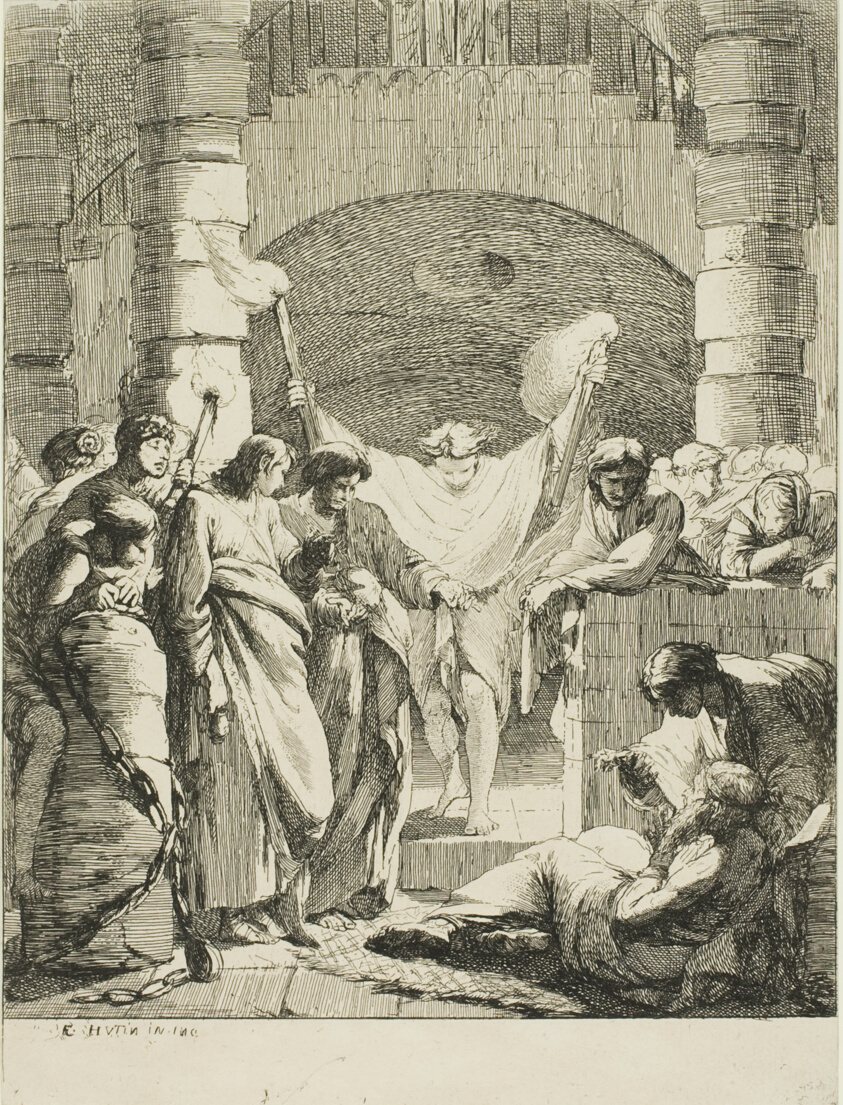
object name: Print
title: Visiting Prisoners, from The Seven Acts of Mercy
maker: François Hutin (French, 1686–1758)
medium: Etching in black on cream laid paper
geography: France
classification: etching; paper; print; prints and drawing